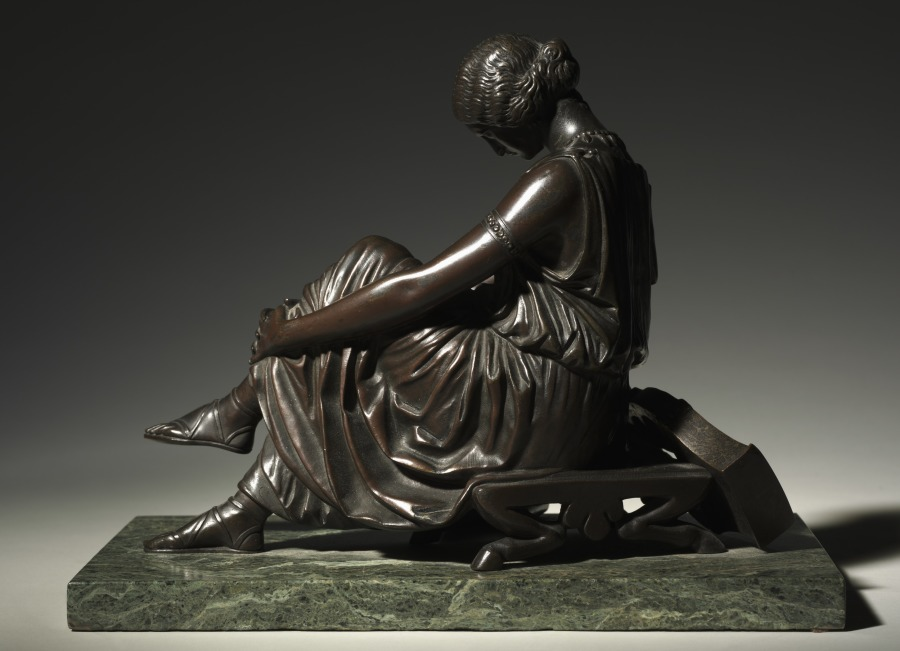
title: Sappho: Portrait of a Woman (Louise Colet)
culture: Switzerland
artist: James Pradier (Swiss, 1790–1852)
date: c. 1830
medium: bronze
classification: Sculpture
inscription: On the front of the stool there is an inscription handwritten into the sculpture prior to casting: "J. PRADIER / Susse," followed by an indistinct mark resembling an ampersand